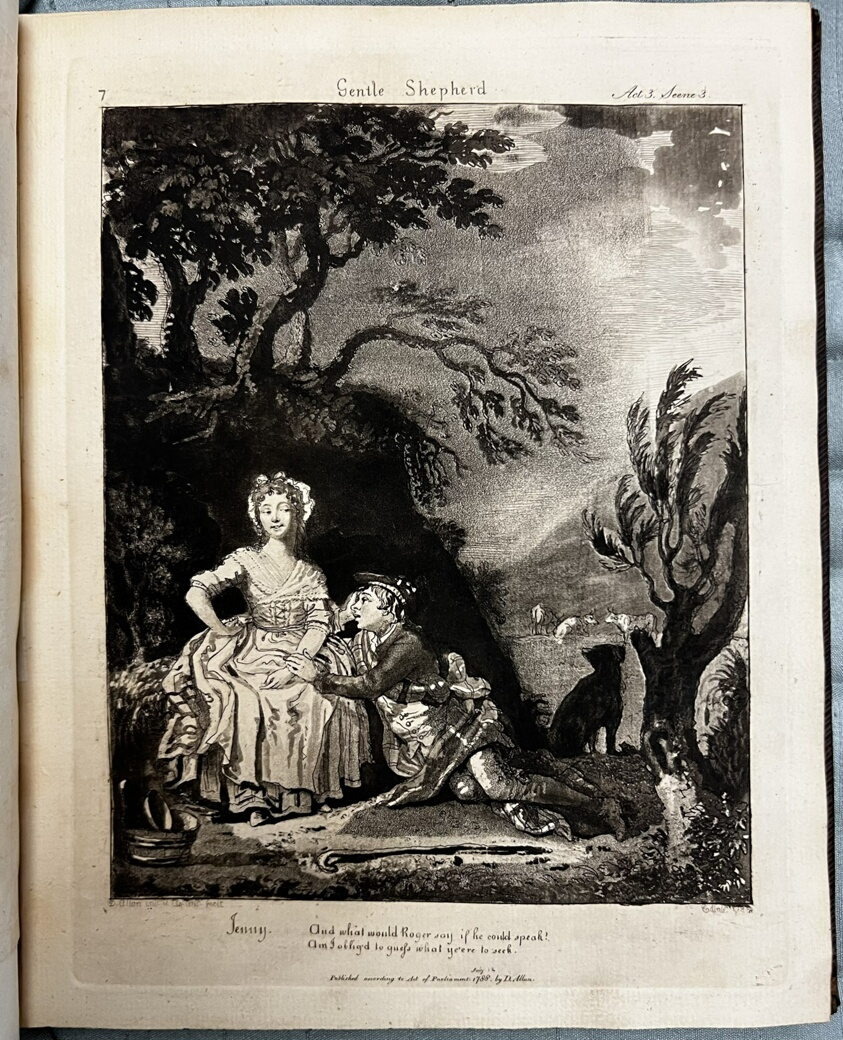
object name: Book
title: The Gentle Shepherd: a Pastoral Comedy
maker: David Allan (Scottish, 1744-1796); written by Allan Ramsay (Scottish, 1686-1758); printed by A. Foulis (Scotland, 18th century)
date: 1788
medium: Book with illustrations in etching and aquatint in black on cream laid paper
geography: Scotland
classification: book; paper; prints and drawing